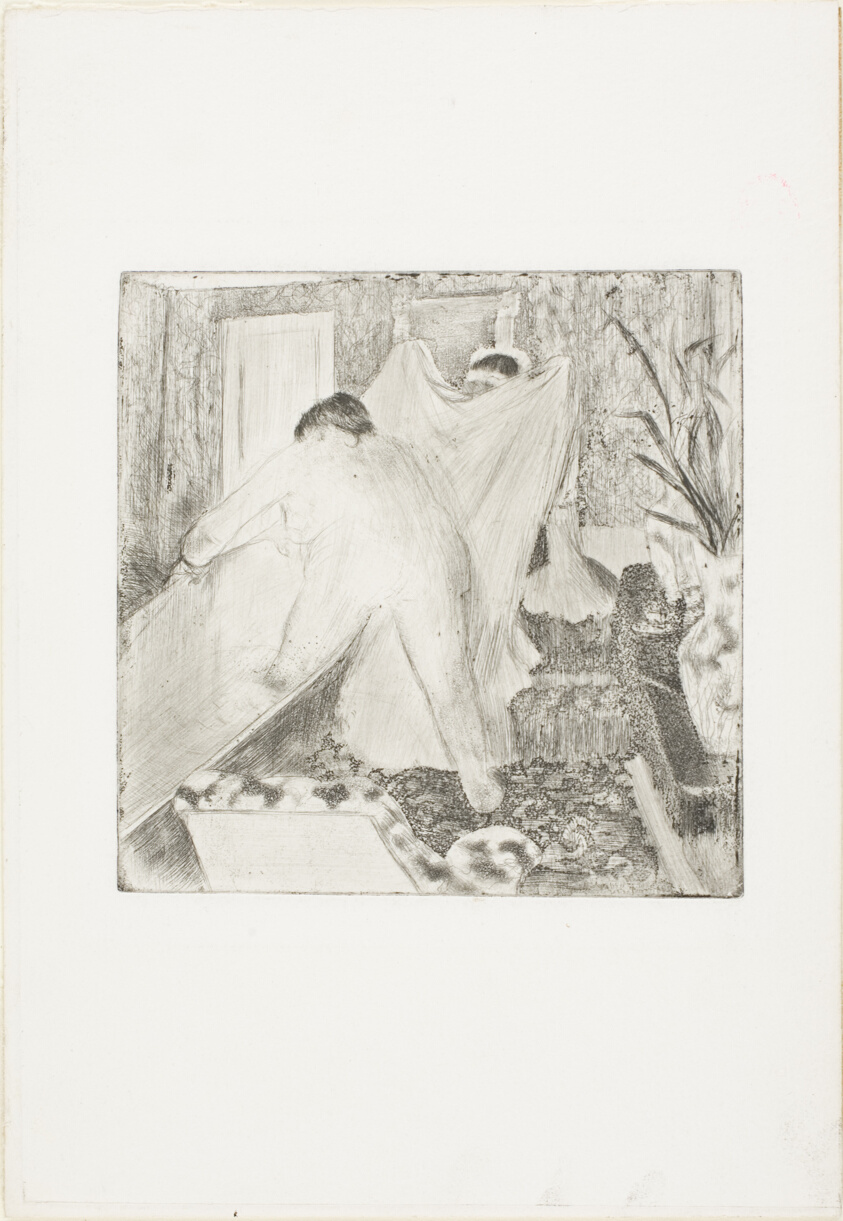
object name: Print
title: Leaving the Bath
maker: Edgar Degas; French, 1834-1917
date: 1879–80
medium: Drypoint and aquatint on white laid paper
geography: France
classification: drypoint; print; prints and drawing; paper